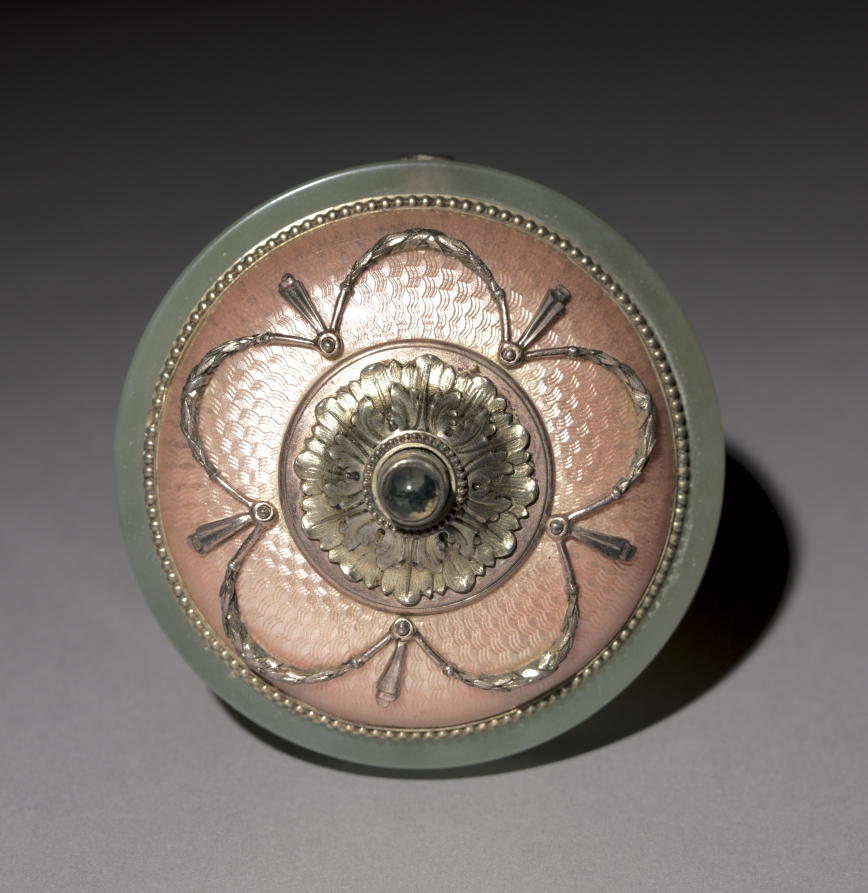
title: Bell Push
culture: Russia, St. Petersburg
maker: House of Fabergé (Russian, 1842–1918)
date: c. 1895–1915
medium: silver gilt, enamel, bowenite, cabochon sapphire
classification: Miscellaneous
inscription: 88; Fabergé (in Cyrillic); another illegible mark.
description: This bell push sat on a dressing table in a wealthy household to summon a servant during the Gilded Age around 1900. Life "below stairs" wasn't as easy as movies and television have portrayed it. Servants could be summoned at all hours of the day and night, interrupting their work, and causing disruption at the whim of the wealthy owners or their guests. The House of Fabergé became the most celebrated Russian supplier of such luxury goods as servant bell pushes. As court jeweler to the Russian imperial family, the Fabergé firm created jewels and luxurious accessories both for the tsar and the Russian state as well as other European royalty and aristocrats.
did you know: The advent of electricity in the 1880s made systems of buttons and bell pushes to call servants more efficient than the old lever and pully system within the wall that often broke with a vigorous tug.